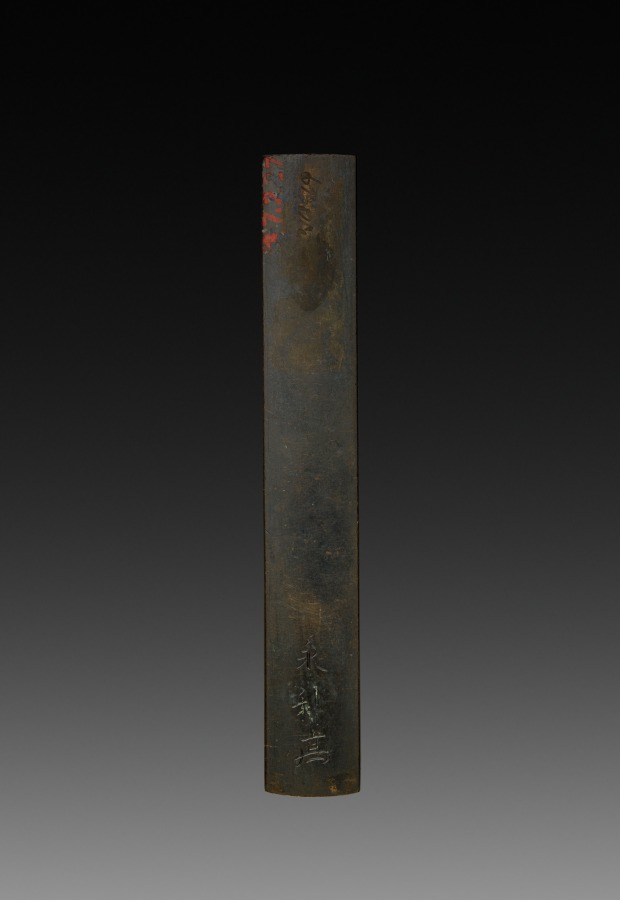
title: Knife Handle (Kozuka)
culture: Japan, Edo period (1615–1868)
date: early to mid-1800s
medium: inlaid bronze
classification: Metalwork